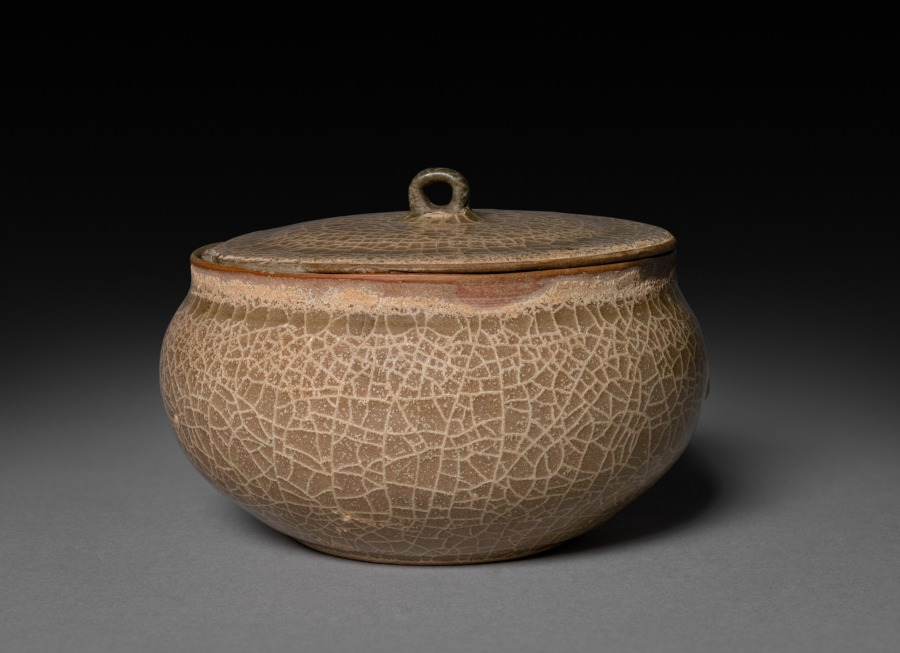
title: Covered Flat Jar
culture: China, Hangzhou, Suburban Altar Kiln, Southern Song dynasty (1127-1279)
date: 1127–1279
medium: glazed buff stoneware, Guan ware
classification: Ceramic